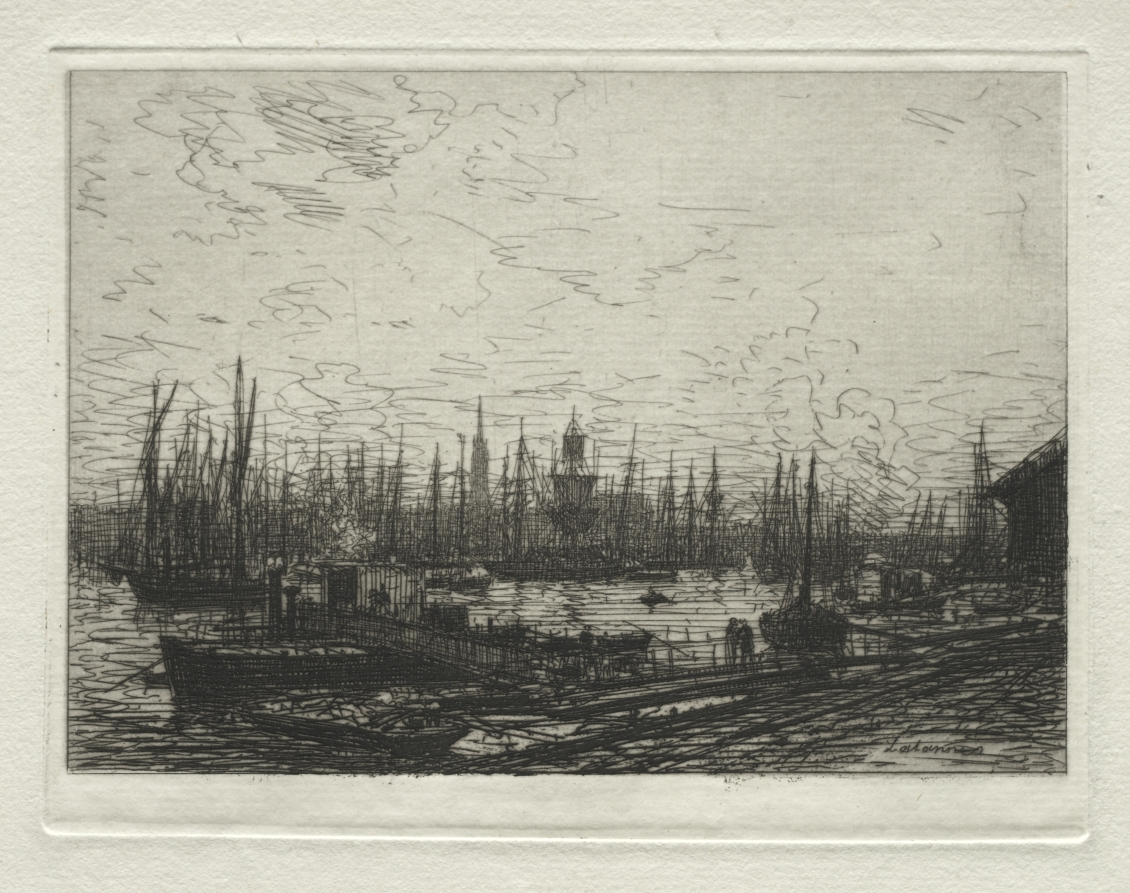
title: Port of Bordeaux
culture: France, 19th century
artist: Maxime Lalanne (French, 1827–1886)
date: 1869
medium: etching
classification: Print